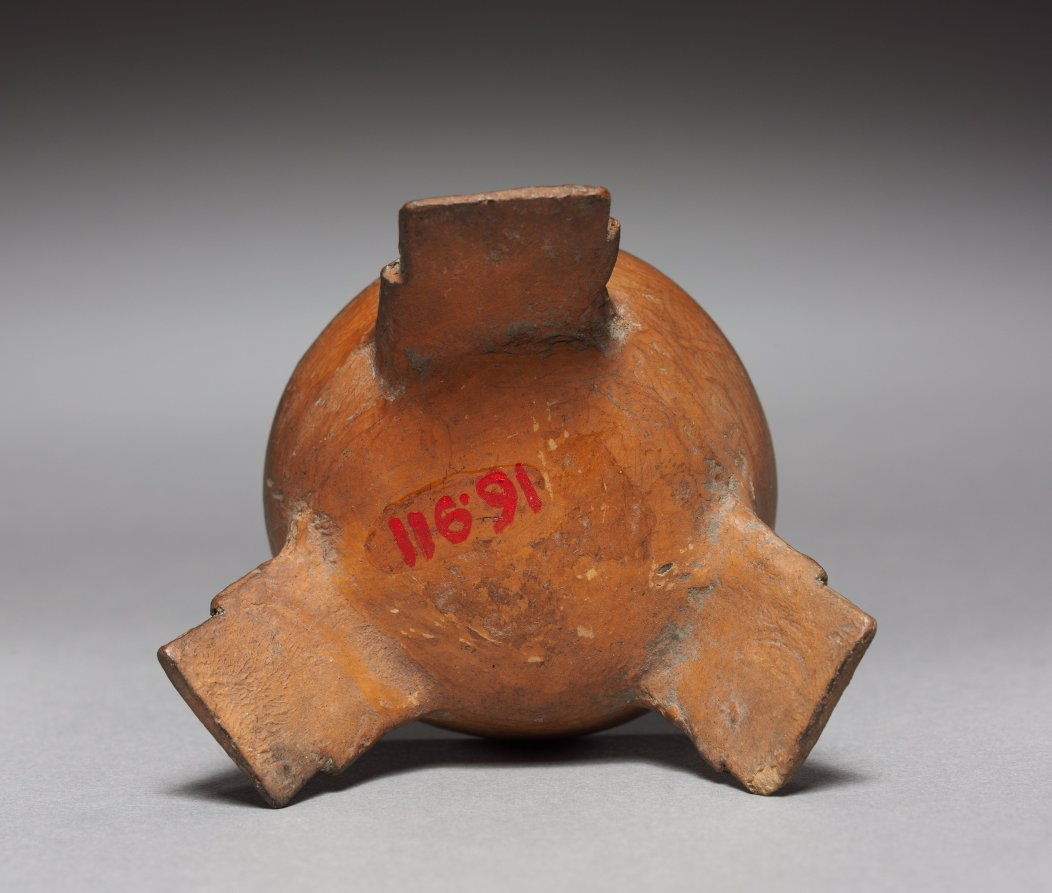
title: Tripod Dish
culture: Mexico, Aztec, 14th-16th century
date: 1325–1521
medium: terracotta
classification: Ceramic